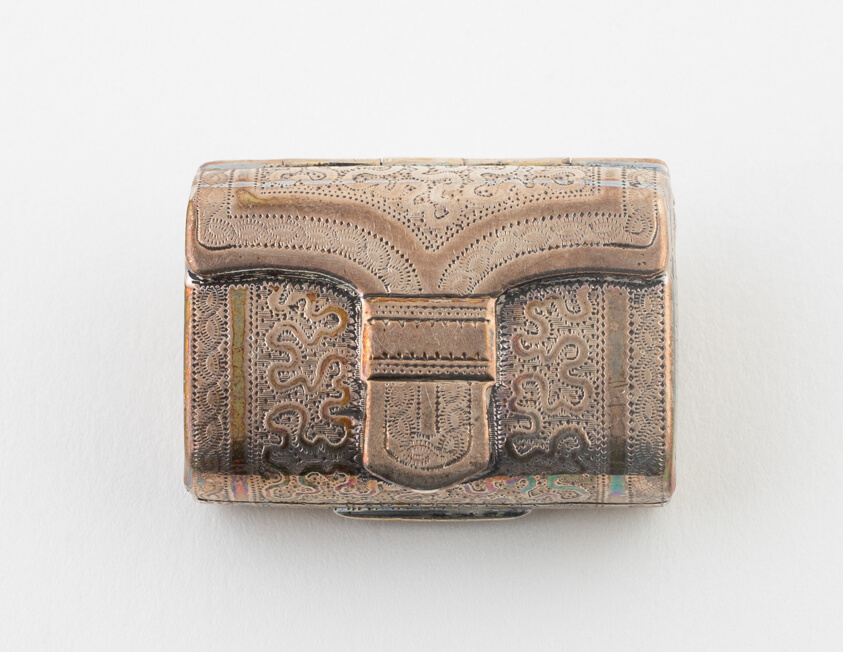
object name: Metalwork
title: Purse-Shaped Vinaigrette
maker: Joseph Willmore; Birmingham, England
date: 1817/18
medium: Silver and silver gilt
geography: Birmingham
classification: container for personal use; vinaigrette (container for health care); european decorative arts; metalwork; silver; decorative object/ornament